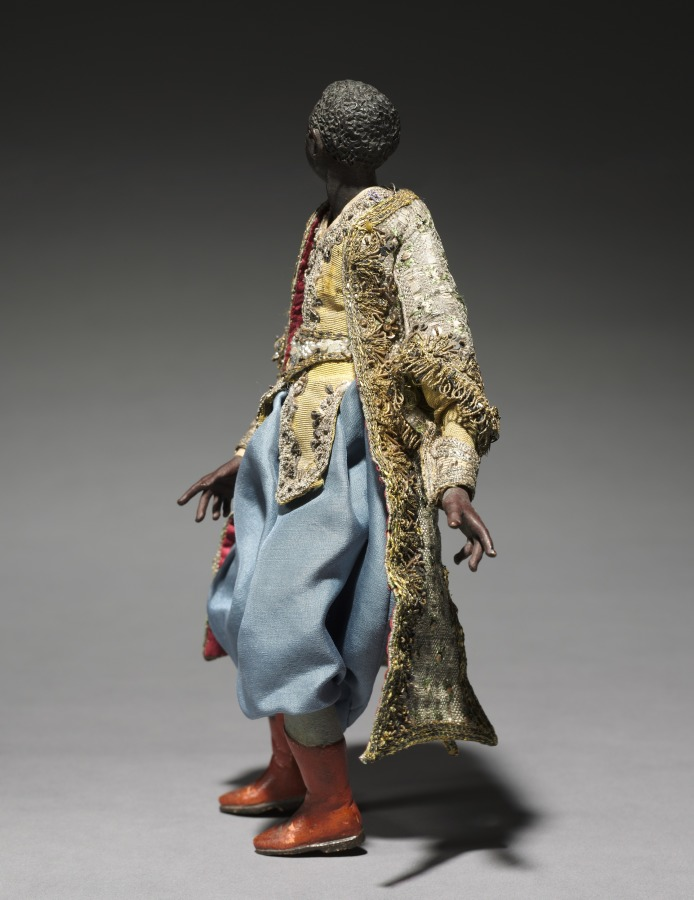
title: Figure from a Crèche: Attendant of the Magi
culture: Italy, Naples, late 18th-early 19th century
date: 1780–1830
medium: painted wood and terracotta with various textiles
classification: Sculpture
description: The practice of creating scenes of the Nativity for the home dates from the early 1700s in Italy, where people began to set up doll-like figures of about a foot or less in height. The custom was particularly popular in Naples around 1800, where crèche scenes (crèche means cradle, or crib) included many figures, whose heads and hands of painted terracotta, stuffed cloth bodies, and clothing adapted from contemporary local costumes gave them an amazingly realistic character. Representations of the birth of Jesus can be traced to the first few centuries of Christianity. Both living creatures and sculptural depictions of them were used from early times. By the late Middle Ages it was customary to create life-size figures of wood or stone, naturalistically painted, to represent the characters who participated in the events of Jesus's early life. These sculptures were then arranged in scenes illustrating one or both of the most important of these events, the Adoration of the Shepherds and the Adoration of the Magi—the three kings from the east who came to pay homage to the Christ child. Used in churches, these large figures were especially popular in Italy, Central Europe, Spain, and Portugal.